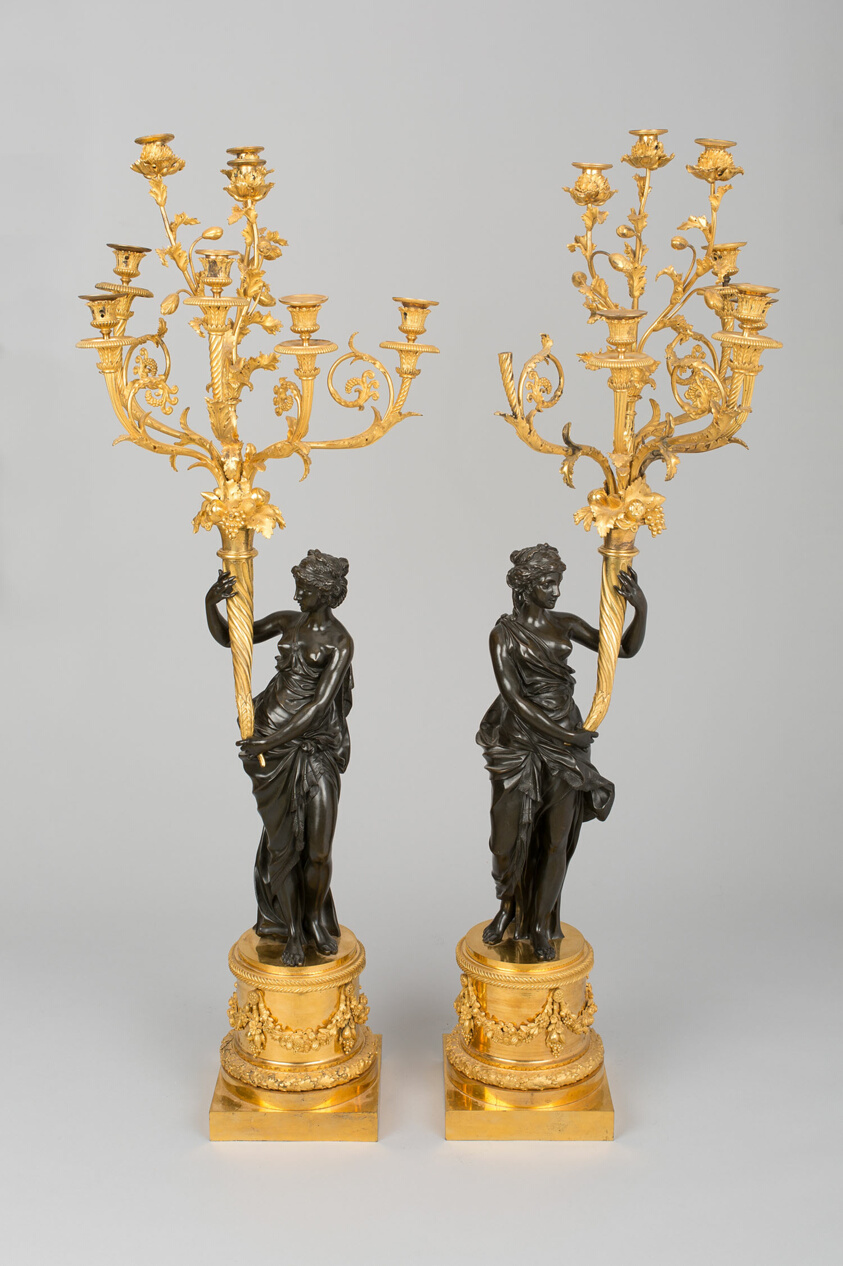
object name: Metalwork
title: Pair of Eight Light Candelabra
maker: Possibly Pierre-François Feuchere; French, 1737-1823; or Louis-Simon Boizot; French, 1743-1809; Paris, France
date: c. 1785 or 19th century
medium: Patinated and gilded bronze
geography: France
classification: candleholder - candelabra; candleholder; functional object; sculpture; metalwork